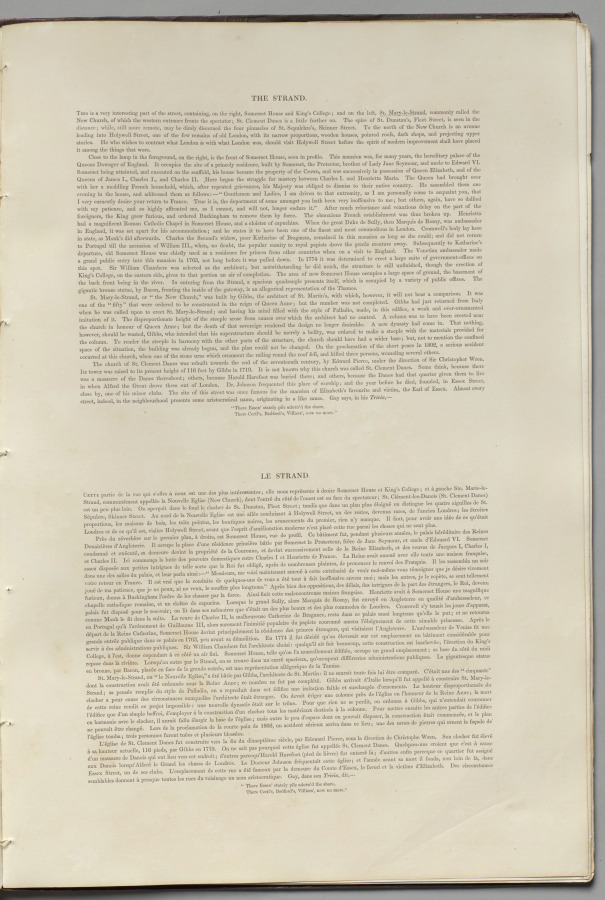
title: London As It Is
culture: England, 19th century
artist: Thomas Shotter Boys (British, 1803–1874)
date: 1842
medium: lithograph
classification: Bound Volume